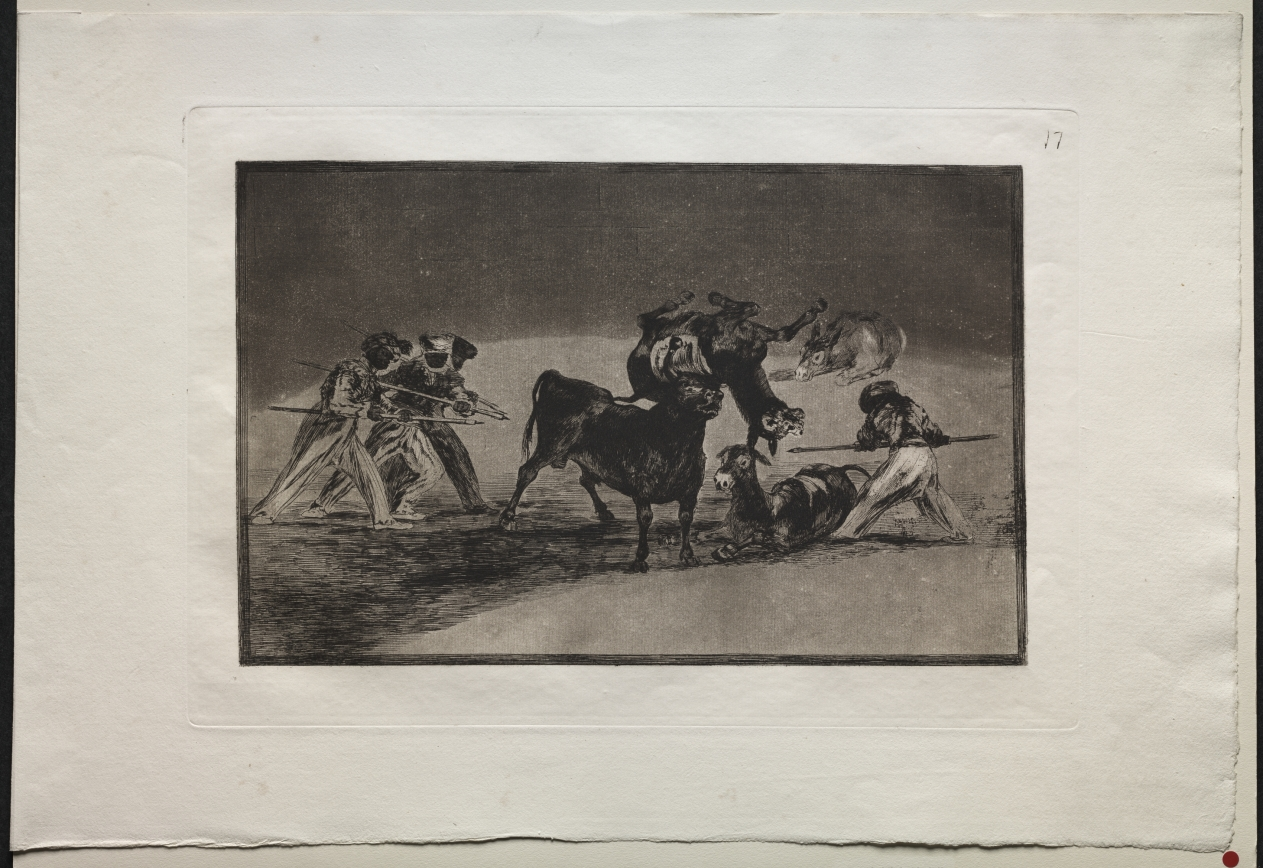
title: Bullfights: The Moors Use Donkeys as a Barrier to Defend Themselves Against the Bull Whose Horns Have Been Tipped with Balls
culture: Spain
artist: Francisco de Goya (Spanish, 1746–1828)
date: 1816, printed 1876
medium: engraving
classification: Print